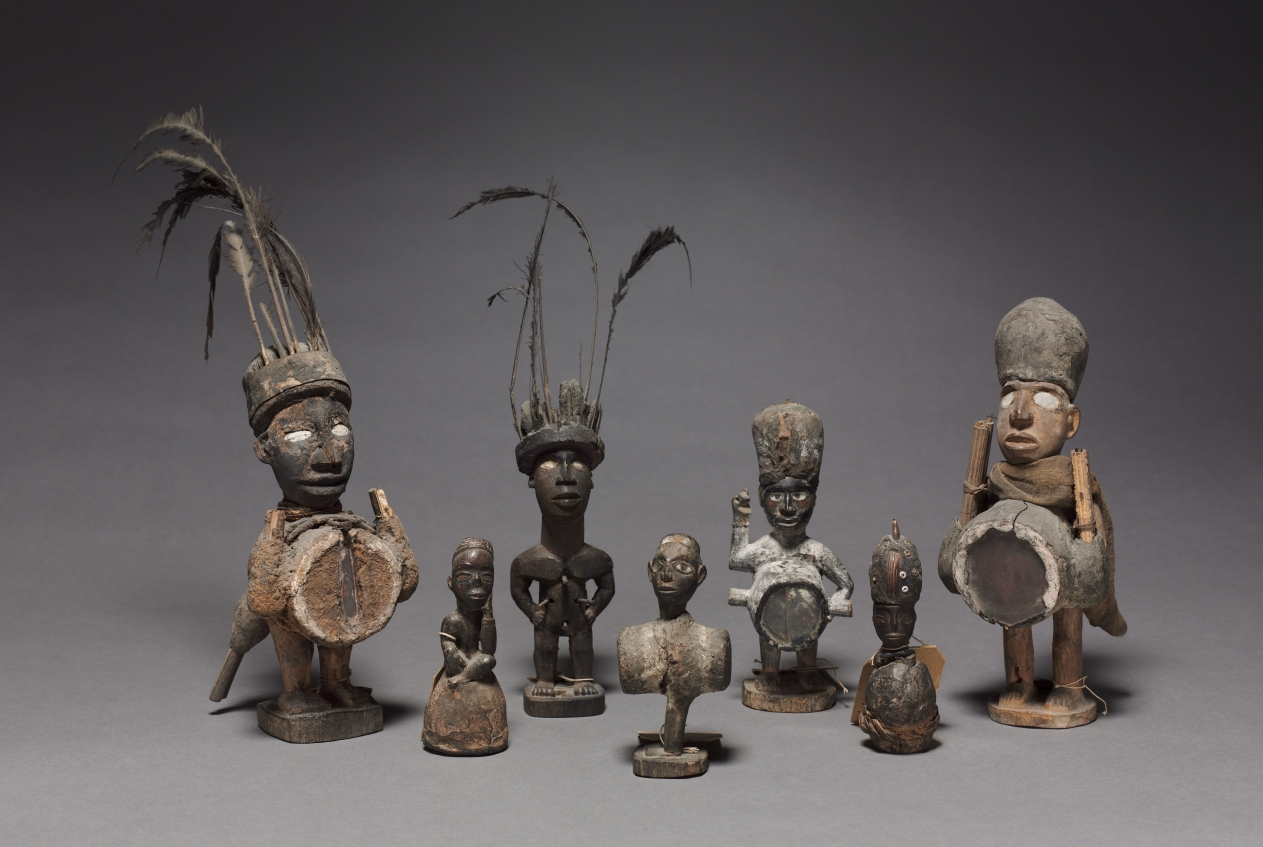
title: Power figure (nkisi)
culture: Africa, Central Africa, Republic of the Congo, Kongo-style maker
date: late 1800s-early 1900s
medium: Wood, organic materials (including resin), cloth, glass, and various other materials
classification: Sculpture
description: One of seven anthropomorphic figurines, these minkisi contained medicines in which an ancestral spirit was believed to reside. The medicines served a metaphorical rather than literal purpose in the resolution of conflicts among Kongo people. This asymmetrical figure wears a mpu headdress of chiefs with its characteristic geometric decoration. The pose may refer to a state of mourning.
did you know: Different from other Minkisi who hold their power in their abdomen, this figure sits atop a sphere in which the active substances still reside.